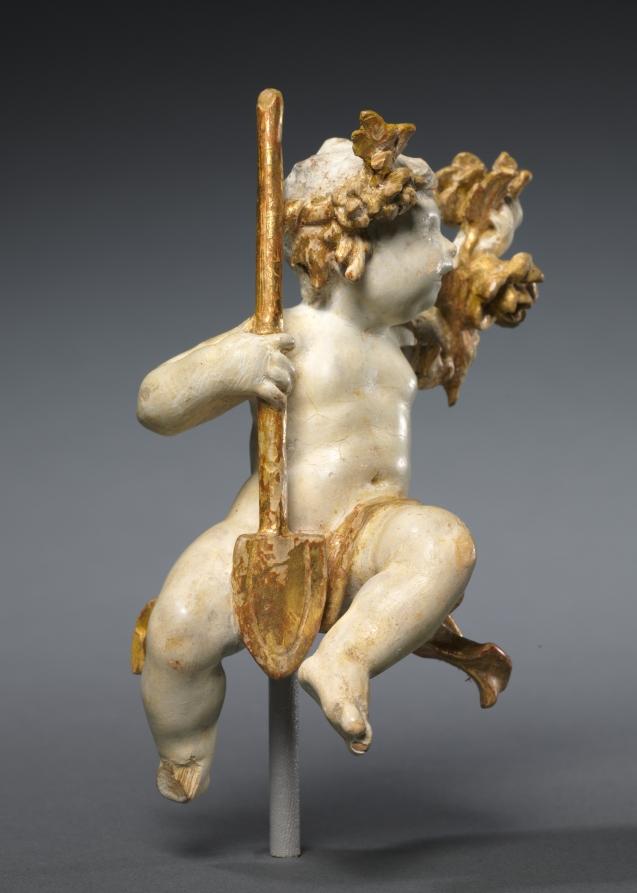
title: Putto as Spring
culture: Germany, 18th century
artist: Ferdinand Tietz (Austrian, 1708–1777)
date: c. 1765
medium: painted and gilded wood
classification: Sculpture